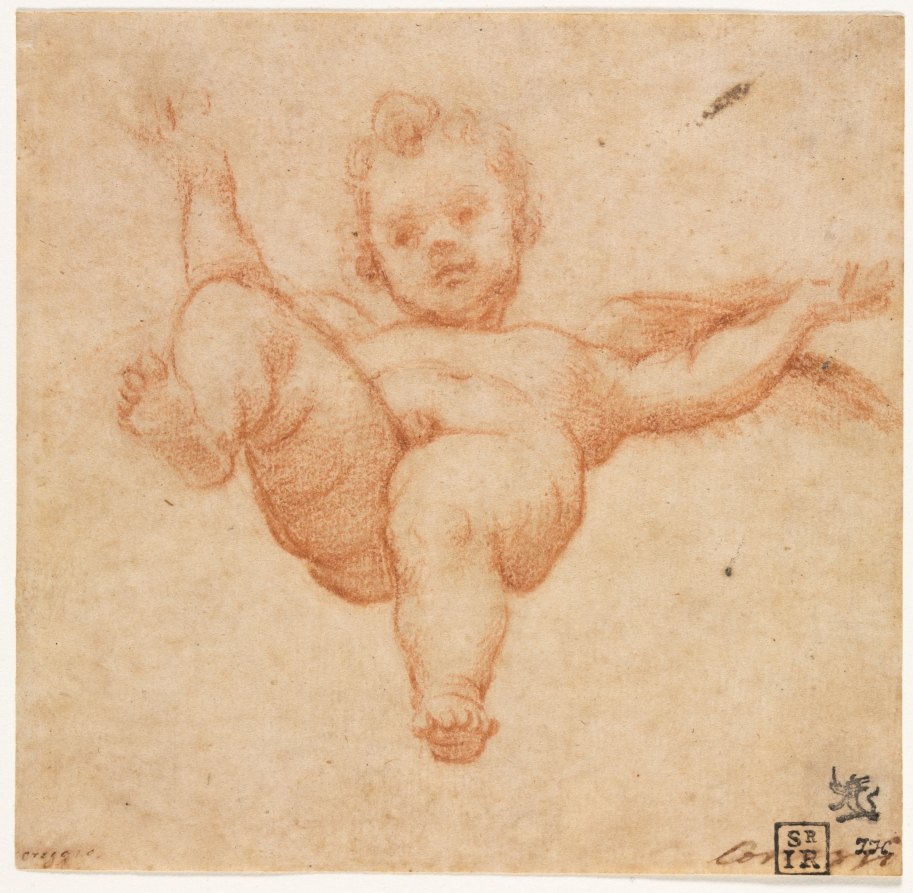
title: Flying Cupid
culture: Italy, 17th century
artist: follower of Annibale Carracci (Italian, c. 1560–1609)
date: c. 1602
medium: red chalk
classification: Drawing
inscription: lower left, in brown ink: [c][cropped]oreggio ; lower right, in brown ink: Coreggi